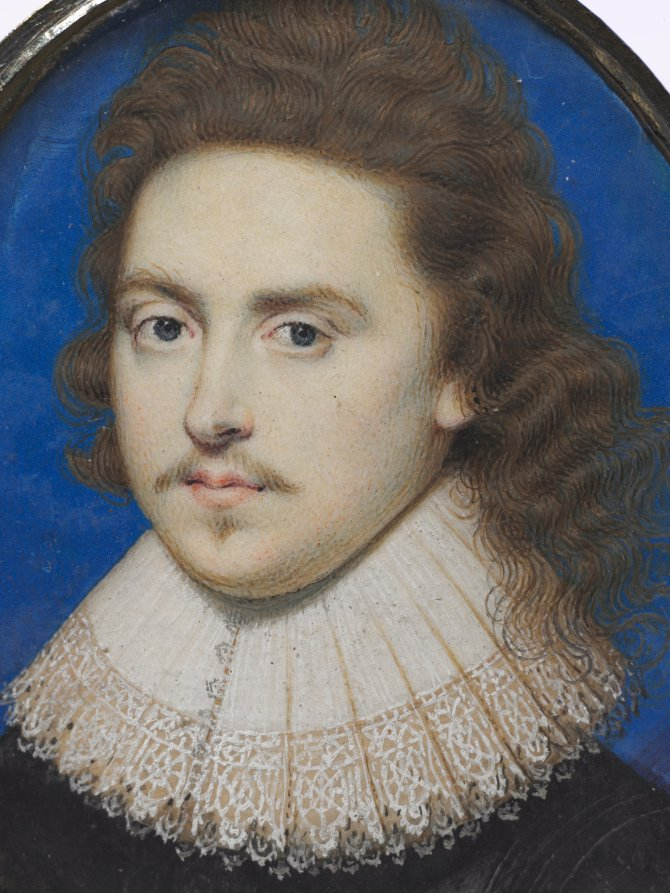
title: Portrait of a Man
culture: England, 17th century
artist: John Hoskins (British, c. 1590–1665)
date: c. 1625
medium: watercolor on vellum with gold border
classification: Portrait Miniature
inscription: signed left: IH [monogram]